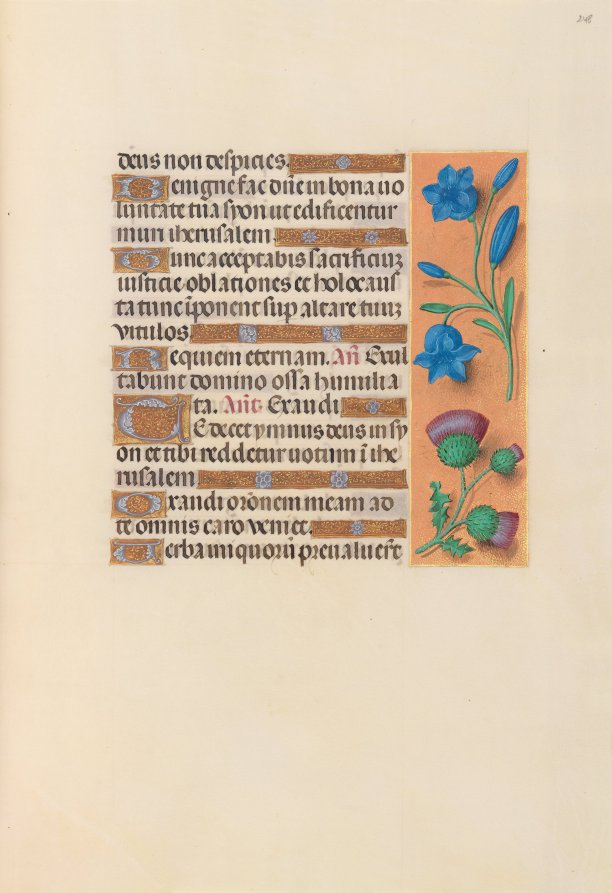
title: Hours of Queen Isabella the Catholic, Queen of Spain: Fol. 248r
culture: Flanders, Ghent and Bruges, late 15th century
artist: Master of the First Prayerbook of Maximillian (Flemish, c. 1444–1519)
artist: and Associates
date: c. 1500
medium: ink, tempera, and gold on vellum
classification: Bound Volume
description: This manuscript was illuminated by a circle of at least five highly organized manuscript painters active in the Flemish cities of Ghent and Bruges. The principal illuminator was Alexander Bening, who painted the majority of the book's miniatures. Manuscripts produced by this circle of artists are renowned for the decoration of their borders, which typically feature a rich variety of realistically-painted flowers, birds, and butterflies. This prayer book, called a book of hours, was intended not for a cleric, but for the private devotions of a lay person-in this case, Isabella the Catholic, Queen of Spain (1451-1504). Isabella's coat of arms embellishes the book's frontispiece. It is unlikely that the book was commissioned by the Queen herself; rather, she probably received it as a diplomatic gift from someone courting her patronage, perhaps Cardinal Francisco Jimenez de Cisneros. A Franciscan friar, Jimenez was dependent upon Isabella for his advancement, first to the post of Queen's confessor in 1492, and then to Archbishop of Toledo in 1495.